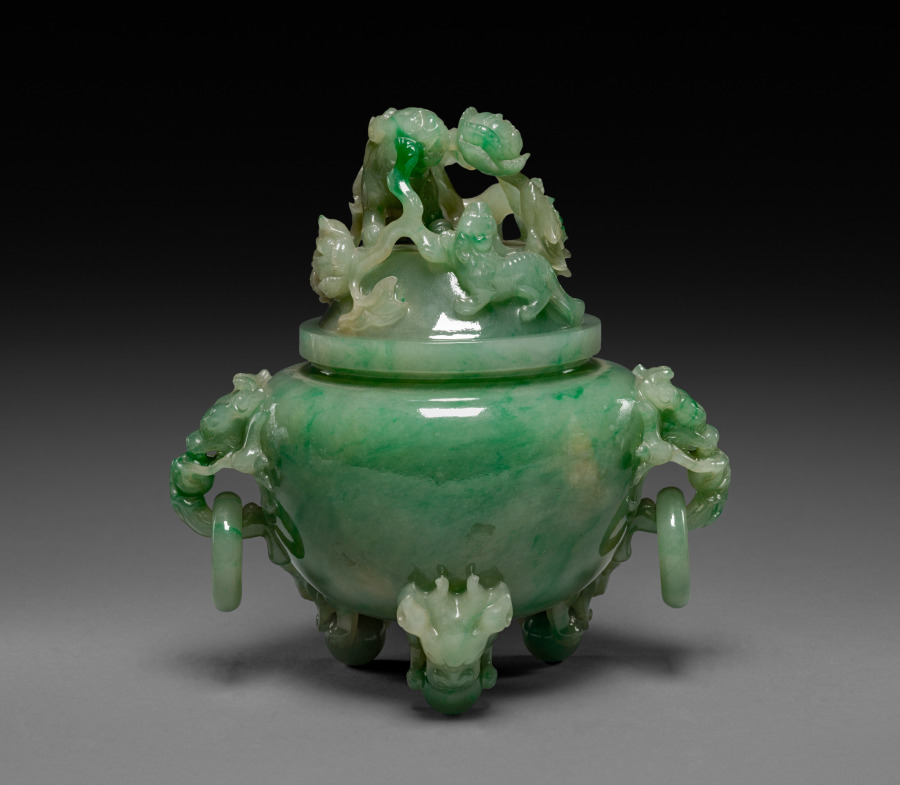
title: Tripod Vase: Ting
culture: China, Qing dynasty (1644-1911)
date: 1644–1911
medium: jade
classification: Jade